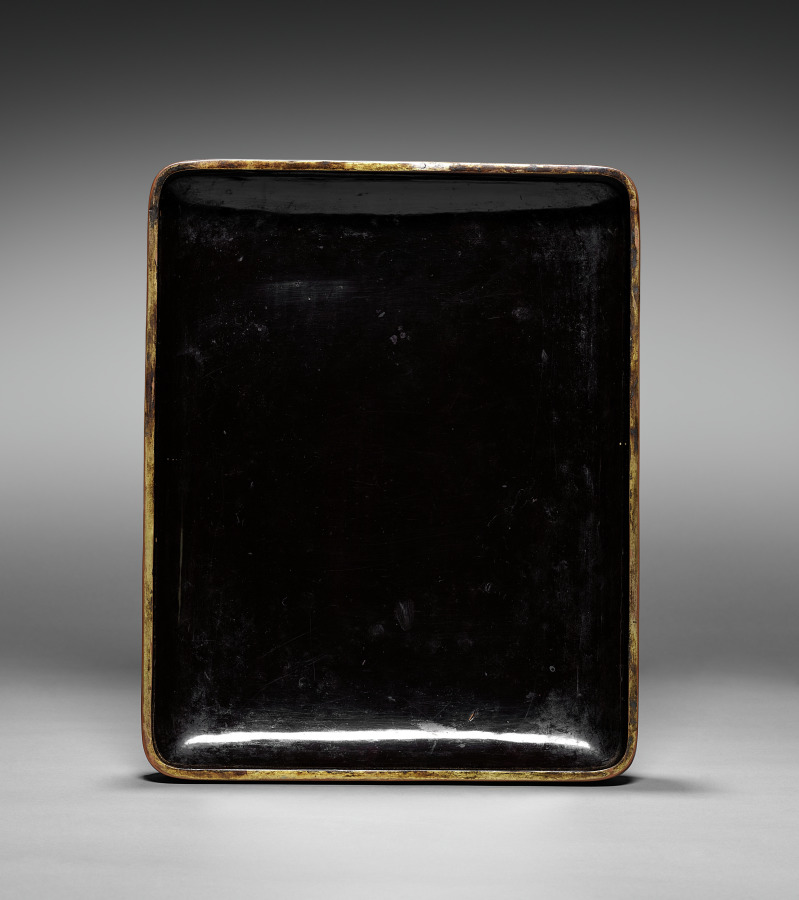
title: Cosmetic Box (lid)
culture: Japan, Momoyama period (1573–1615)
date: 1573–1615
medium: wood with lacquer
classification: Lacquer